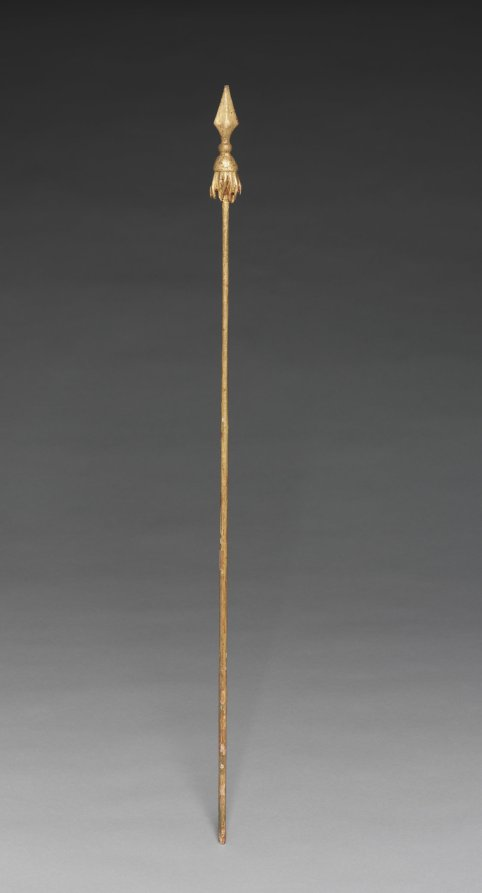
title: Altarpiece with Relics - Lance, lower right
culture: Germany, Bavaria, 18th century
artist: Joseph Matthias Götz (German, 1696–1760)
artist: and Workshop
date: c. 1735–1740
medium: gilded wood, with relics in niches: gilded wood, mother-of-pearl, ebony, red silk, gold wire, seed pearls, rock crystal, pen and ink on paper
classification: Sculpture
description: Götz covers every surface in gold leaf, giving each part of the object equal importance, rather than simply framing a central picture. In this distinctively Central European approach, figural narrative is subordinate to the overall ensemble. Götz designed this object to rest on top of an altar, probably in front of a larger painted or sculpted decorative scheme. The work contains relics seen through the small windows on the perimeter. These small remains of holy figures demonstrate the persistence of a medieval Catholic tradition well into the 1700s.